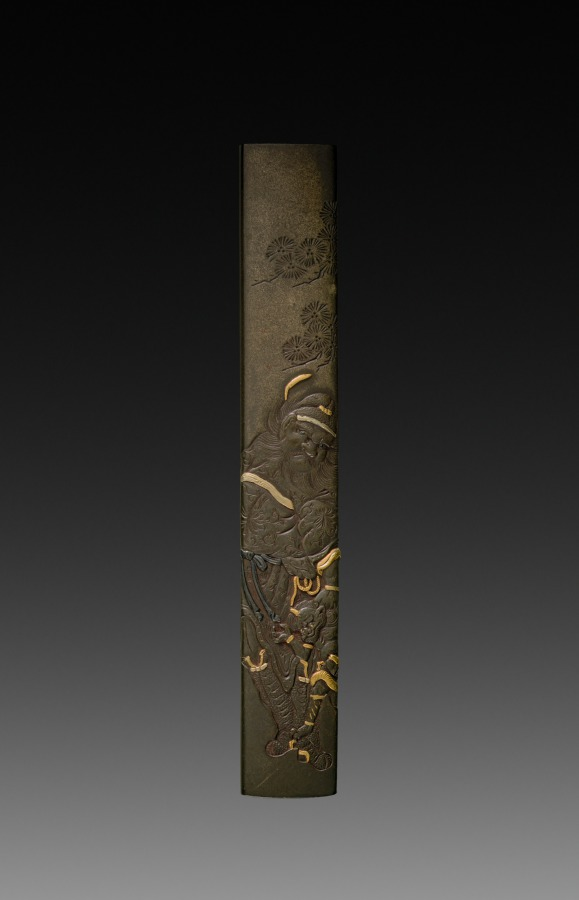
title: Knife Handle (Kozuka)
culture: Japan, Edo period (1615–1868)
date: c 1800s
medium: inlaid bronze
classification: Metalwork